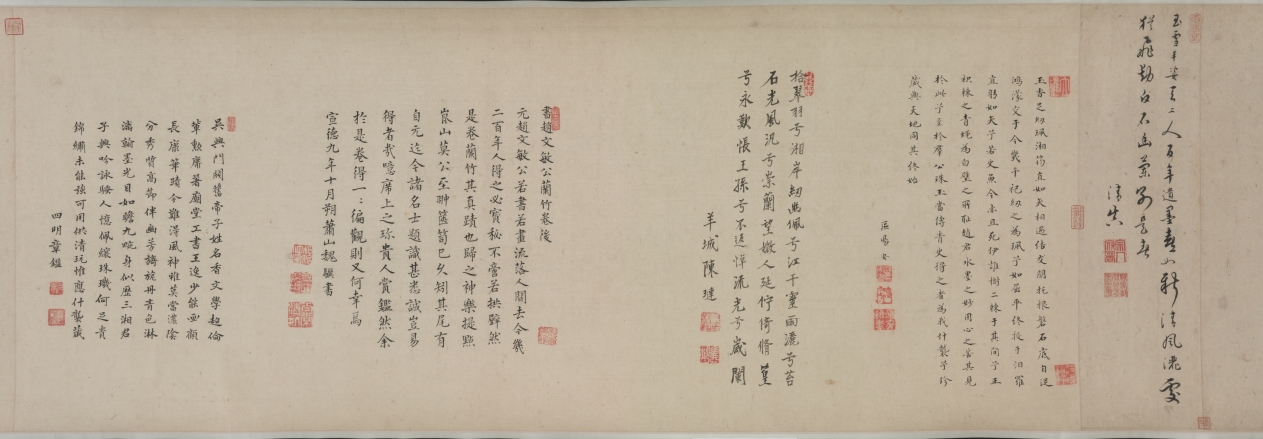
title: Bamboo, Rocks and Lonely Orchids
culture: China, Yuan dynasty (1271-1368)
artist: Zhao Mengfu (Chinese, 1254–1322)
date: 1271–1368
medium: Handscroll; ink on paper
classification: Painting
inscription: 竹石幽蘭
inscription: 孟頫為善夫寫. [印] 趙氏子昂; [印] 松雪齋; [印] 天水郡圖書印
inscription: 古人善書者必能畫點墨作蠅，便自有生意。松雪翁蘭石草聖飛帛筆法皆具，可寶也。安陽韓性 [印]明善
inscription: Colophon 2. Qiu Yuan 仇遠 (1247-after 1328), a respected poet during the Song and Yuan periods. He was linked to, among others, Zhao Mengfu and Gao Kegong. Zhao Mengfu painted a version of Nine Songs 九歌圖 for him, and Gao Kegong dedicated to him a painting titled Mountain Village 山村圖 (current whereabouts unknown). His poem here is also preserved in his collected works.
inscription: Colophon 3. Zheng Yuanyou 鄭元祐 (1292-1364), an erudite scholar and teacher of renown, active in Hangzhou and Suzhou. In the 1350s, when Gu Ying’s literary gatherings were at their peak, he was already elderly and participated in a limited way.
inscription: Colophon 4. Wu Kegong 吳克恭 (active mid-1300s), a friend of Gu Ying and Ni Zan 倪瓚 (1301–1374), a major Yuan painter.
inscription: Colophon 5. Angji 昻吉 (jinshi of 1348), of Western Xia 西夏 origin and a poet of distinction. He wrote an introduction to the painting Literary Gathering at Yushan 玉山雅集圖, of which Zhang Wo was the painter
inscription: Sheet 2. Yuan: friends of Gu Ying Colophon 6. Wang Zifang 王孜方 (active mid-1300s), an official who, at the time of his visits to Gu Ying’s estate, had reached the rank of Minister. He is better known under the name Wang Keju 王可矩.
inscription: Colophon 7. Ke Jiusi 柯九思 (1290–1343), a major official who served in the Kuizhang Pavilion 奎章閣 and as an advisor to Emperor Wenzong in matters of calligraphy and painting.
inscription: Colophon 8. Yu Li 于立 (active mid-1300s), a Daoist recluse, poet, and close friend of Gu Ying, so much so that during his visit to Gu Ying’s estate he was given accommodation in a special pavilion. His poem here is also preserved in Gu Ying’s Cao tang ya ji.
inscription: 至正十一年十月廿八日男奕百拜堇觀 [印] 趙奕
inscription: Colophon 10. Yu Ji 虞集 (1272-1398), a major official and literary figure who also served in the Kuizhang Ge. His poem is recorded in his collected works. The poem is one of a set of four inscribed at the request of Wang Huayu 汪華玉 on Orchids and Rock 蘭石圖 by Zhao Mengfu, obviously a different, long lost, painting. Wang Huayu was an official and a collector (jinshi of 1327). Yu Ji’s colophon here was written before 1348 and during his retirement in Linchuan 臨川, Jiangxi, possibly sent from there. It is possible he had not seen the painting, and his calligraphy here appears to be rather casual and detached, jotting down an old poem without much care, contrary to his earlier practice.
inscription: Colophon 11. Sun Shi 孫時 (mid-1300s–early 1400s), a native of Yuncheng 鄆城, Shandong, and a jinshi of 1390. He may have been quite young when paying a visit to the Yushan gatherings in the late 1340s and early 1350s.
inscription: Colophon 12. Zhang Zhu 張翥 (1287–1368), Qiu Yuan’s disciple and a poet of renown, who enjoyed a belated career in officialdom and was known for his integrity.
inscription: Sheet 4. Yuan and Ming: further friends of Gu Ying; colophon 17 begins the early Ming sequence. Colophon 13. Zhang Wo 張渥 (active c. 1336-after 1364), a frustrated scholar, a poet, and a painter of landscape and figures. An active participant in Gu Ying’s literary circle, he painted the Literary Gathering at Yushan, a pictorial document of the individuals and activities on Gu Ying’s estate. His rendering of Nine Songs is well known, and one version is in the collection of the Cleveland Museum of Art (see 1959.138). His poem here is also found in Gu Ying’s Cao tang ya ji, under the entry “ti Zhao Hanlin mo lan 題趙翰林墨蘭” (inscribed on the Ink Orchid by Zhao the Hanlin academician). This is a rare instance of calligraphy as well as signature by the artist.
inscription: 觀吳興公竹石幽蘭圖使人鄙吝頓消。其筆勢從橫天真爛澷，一出於二王書法。冝仲瑛寳而玩之異於常品也。至正八年十月天台陳基書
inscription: Colophon 15. Zhang Shen 張紳 (active about 1340–after 1385), a respected calligrapher and participant in Gu Ying’s literary gathering. He resided in Kunshan, the same city where Gu Ying’s estate lies. In the third line of the poem, he mentioned Gu Ying’s hao, “Jinsu 金粟.” This was a name he assumed later in life, after the death of his mother in the year 1356. Thus this inscription must have been written after that date.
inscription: Colophon 16. Wang Sun 汪遜 (active mid-14th century), a little-known native of Kuaiji 會稽, who may have been one of the infrequent visitors to Gu Ying’s estate.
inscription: Colophon 17. Hu Guang 胡廣 (1370-1418) is the first Ming colophon writer on this scroll. He was an official of great power in the court and a trusted advisor of Emperor Chengzu; he served as the Grand Academician of the Hall of Literary Profundity 文淵閣大學士 and Grand Academician of the Left Secretariat of the Heir-Apparent 左春坊大學士.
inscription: Sheet 5. Early Ming Colophon 18. Wang Yinshi 王尹實 (active about 1403–about 1424), a native of Siming 四明, Zhejiang, and a minor official and calligrapher.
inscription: Colophon 19. Zhang Yuchu (signed here as “Wuwei 無 為”), the forty-third Heavenly Master of the Zhengyi sect of Daoism. A man of erudition, he was also a poet, painter, and calligrapher. A modified version of the poem here was published in his collected works titled Xian quan ji 峴泉集. A slight modification in the first line is the only change: “Wu xing miao yao nian bing xue zi 吳興玅年氷雪姿.”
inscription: Colophon 20. Yao Guangxiao 姚廣孝 (1335-1418), a Buddhist monk, scholar, and counselor to Chengzu in his successful attempt at usurpation of the throne. Yao Guangxiao was a controversial figure but wielded enormous power.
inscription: Sheet 6. Wang Ning alone Colophon 21. Wang Ning 王寧 (d. 1411) signed as “Qingzhen 清真” in this colophon. One of the three seals reveals his identity as the Yongchun Hou 永春侯 [Marquis of Lasting Spring] (appointed 1402), and the husband of Princess Huaiqing 懷慶公主 (1328-1398), the sixth daughter of the founder of the Ming dynasty, Zhu Yuanzhang. This colophon postdates 1402.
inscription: Sheet 7. Mid-Ming Colophon 22. Ou Yi’an 區易安 (active first half of 15th century), unknown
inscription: Colophon 23. Chen Lian 陳璉 (1370-1454), a native of Dongguan 東莞, Guangdong 廣東, and an official admired for his erudition and perspicacity. In view to the known calligraphic style of Chen Lian, this colophon appears to be a transcription and not written by him.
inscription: Colophon 24. Wei Ji 魏驥 (1374-1471) enjoyed longevity (he lived to the age of ninety-eight) and an extended length of service as an official. A jinshi of 1406, he eventually became the Minister of Personnel in Nanjing 南京吏部尚書. The colophon here is dated 1434, when he was invited to view the painting by the Court Musician Mo Zhizhong 莫至翀, its owner. Again, in view of its calligraphic style, this was not written by him, but is a transcription from the original.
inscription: Colophon 25: Zhang Yi 章鎰 (active 1462-1473), a Ningbo native and an official with a reputation for courage and integrity.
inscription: Sheet 8. Further mid-Ming Colophon 26. Yin Zhi 尹直 (1427-1511), a controversial figure in Ming politics in spite of his erudition and high position as the Minister of War 兵部尚書.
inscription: Colophon 27. Zou Yu 鄒虞 (active 1460-1520; jinshi of 1490), a native of Hangzhou. In 1510, he was appointed Administrative Vice Commissioner in Guangdong.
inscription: Sheet 9. Xu Shouhe 徐守和 alone Colophon 28. Xu Shouhe 徐守和 dated his entry in 1629. Since he wrote it in his own studio, The Lesser Qingbi Pavilion 小清閟, he was likely the owner of the scroll. Xu’s life is not well documented; he was a connoisseur of note during the last years of the Ming dynasty rule. He may have acquired the Cleveland scroll from Wu Ting, whose seals appear here.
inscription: Sheet 10. The mounter’s note. Xu Shudong 徐曙東 of Jiaxing 嘉興 made the remounting on the first day of sixth month, 1802.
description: Bamboo and orchids are motifs associated with the virtues of the scholar-official. Bamboo that bends but does not break stands for moral integrity, endurance, and loyalty. Wild, fragrant orchids that bloom in the shadow symbolize modesty and the aura of learnedness. Rocks are often considered to be miniature versions of mountains that form the universe. This monochrome ink painting is brushed on paper in a masterfully calligraphic manner. While the rocks are delineated in chalky, dry strokes showing the effect of flying white (feibai), the bamboo and orchids are drawn with a swift brush demonstrating the virtuosity of the artist.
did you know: One of the many inscriptions records that the handscroll was last remounted by Xu Shudong 徐曙東 of Jiaxing 嘉興 in 1802.